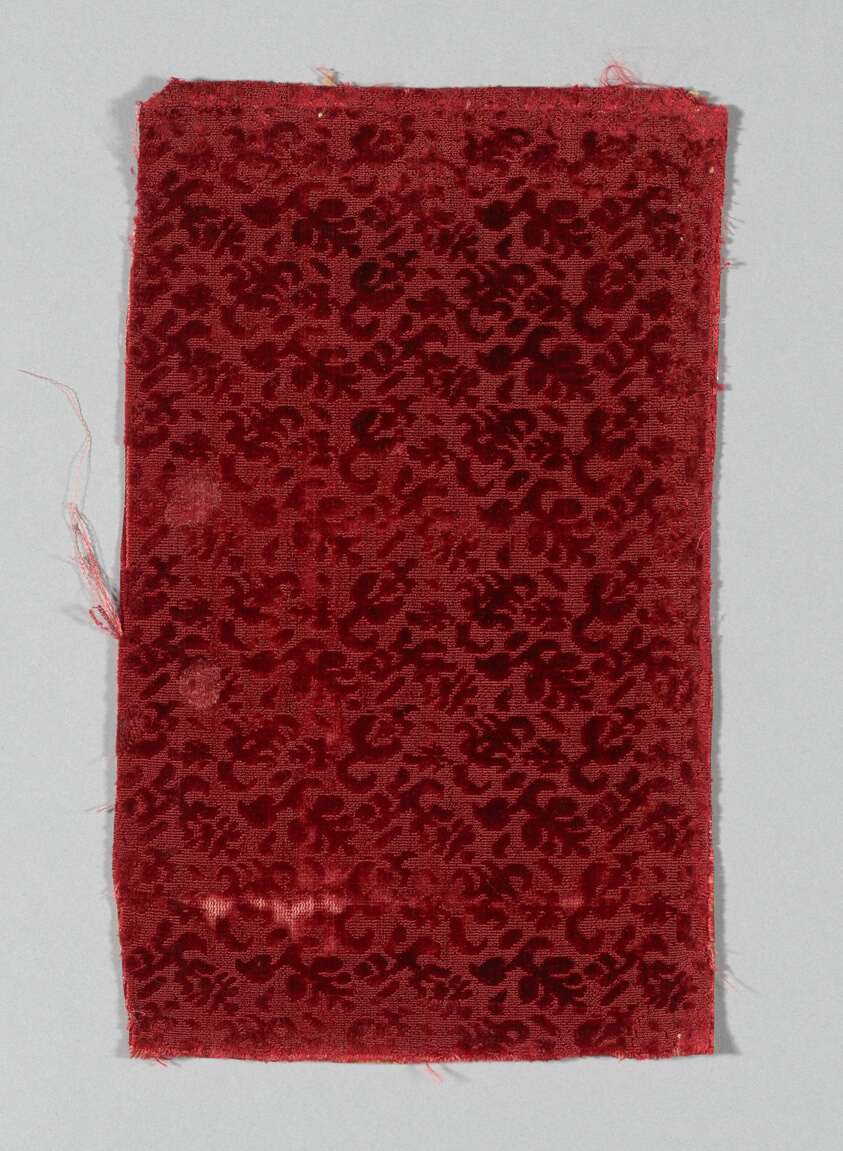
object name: Textile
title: Fragment (Dress Fabric)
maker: Italy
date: 1601/50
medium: velvet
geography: Italy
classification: textile; weaving - velvet